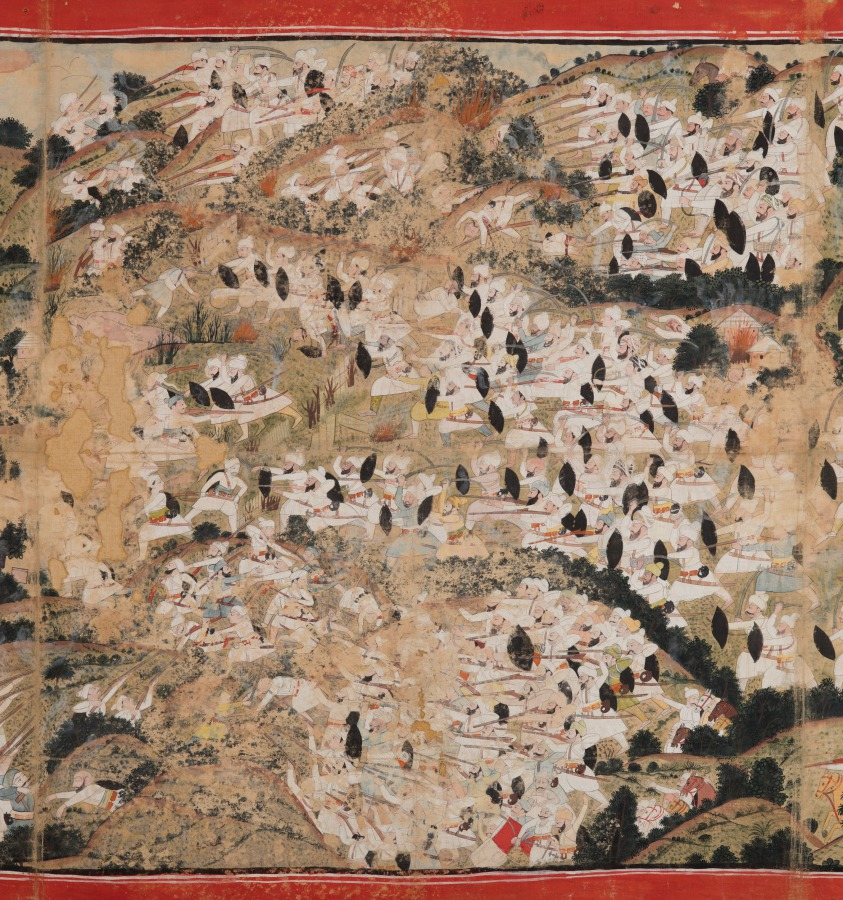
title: Raja Sansar Chand attacking Kangra Fort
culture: Northern India, Pahari kingdom of Kangra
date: after 1782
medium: Gum tempera, ink, and gold on cotton cloth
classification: Painting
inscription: Inscriptions in Takri and Persian. Persian reads: “On the 23rd of the month of Kartik, Samvat 1839 (1782 AD) Sri Maharaja Sansar Chand Bahadur attached Lakkarkot (Nagrakot ?) and the fortress of Kangra, attained victory and made siege intrenchments at the fortress of Kot Kangra.”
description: In 1782, the 17-year-old king of Kangra fought to retake his ancestral kingdom from the Mughals, who had controlled the territory since 1620. He rides a dark brown horse in front of the camel at the far right, blending in among his army and allies. The leftmost panel shows the residents of Kangra fleeing the conflict with their belongings on their heads to the safety of the fortress at the far left, from the walls where cannons are being fired. The main temple, built of gray stone, is in the middle of the composition, marked by red flags.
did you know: The king is 17 years old, beardless, riding a dark brown steed in front of the camel at the far right.